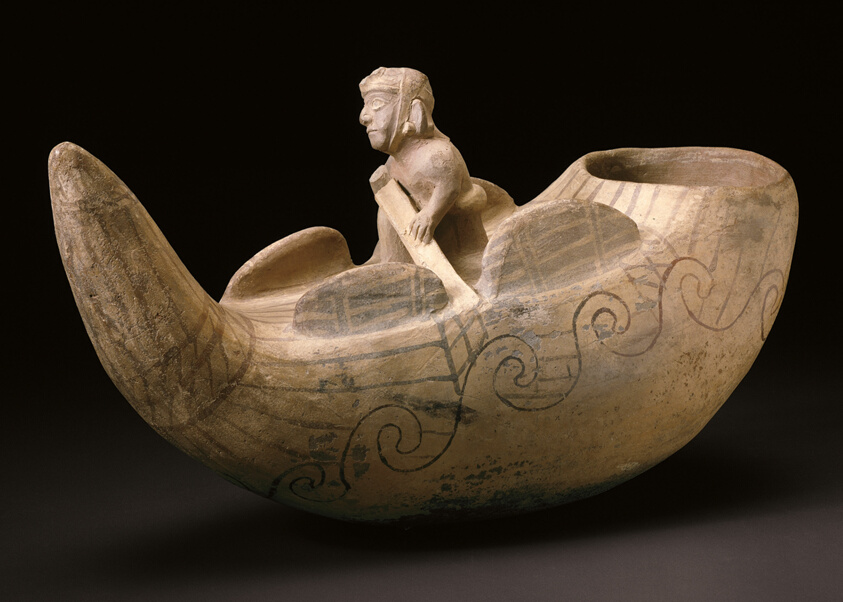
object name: Vessel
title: Vessel in the Form of a Fisherman in a Reed Boat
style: moche, mochica v, mochica, early intermediate period, Pre-Columbian, americas, andes, Arts of the Americas, andean, south american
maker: Artist unknown (Moche); North coast, Peru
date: 100 BCE–500 CE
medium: Ceramic and pigment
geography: Peruvian North Coast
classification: earthenware; ceramics; vessel; art of the americas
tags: people